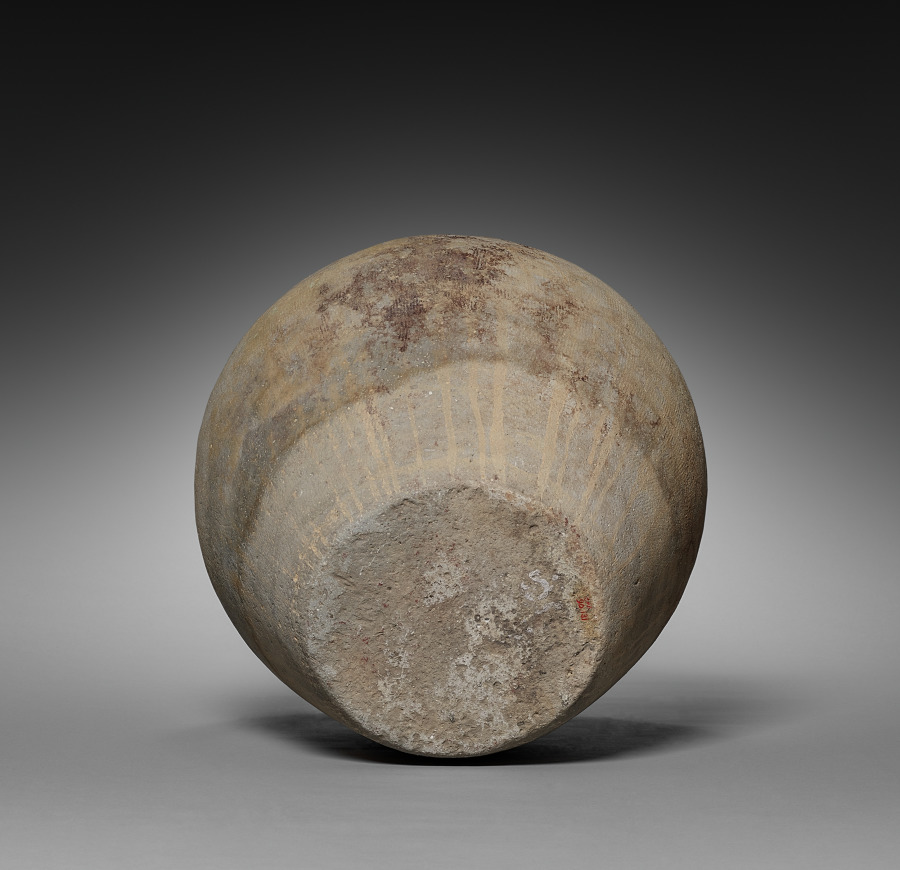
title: Burial Urn with Cover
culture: Korea, Three Kingdoms period (57 BCE–668 CE)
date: 300s–500s CE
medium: earthenware with impressed design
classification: Ceramic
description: Produced in closed kilns built on hillsides during the Three Kingdoms period, this lidded jar once contained the cremated remains of the dead. This type of burial jar became widespread after the introduction of Buddhism, as cremation became a common practice in Korea.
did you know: Closed kilns built on hillsides became widely used for producing this type of pottery vessel in Korea during the Three Kingdoms period.